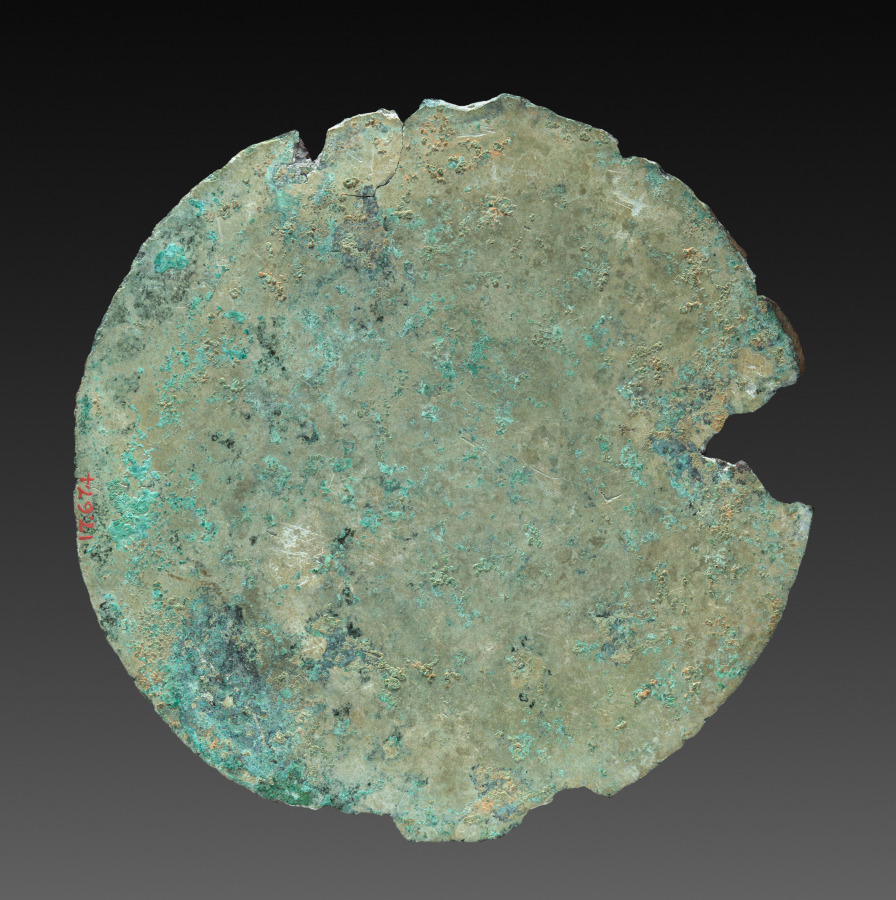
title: Mirror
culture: Japan, Heian period (794–1185)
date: 794–1185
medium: bronze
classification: Metalwork